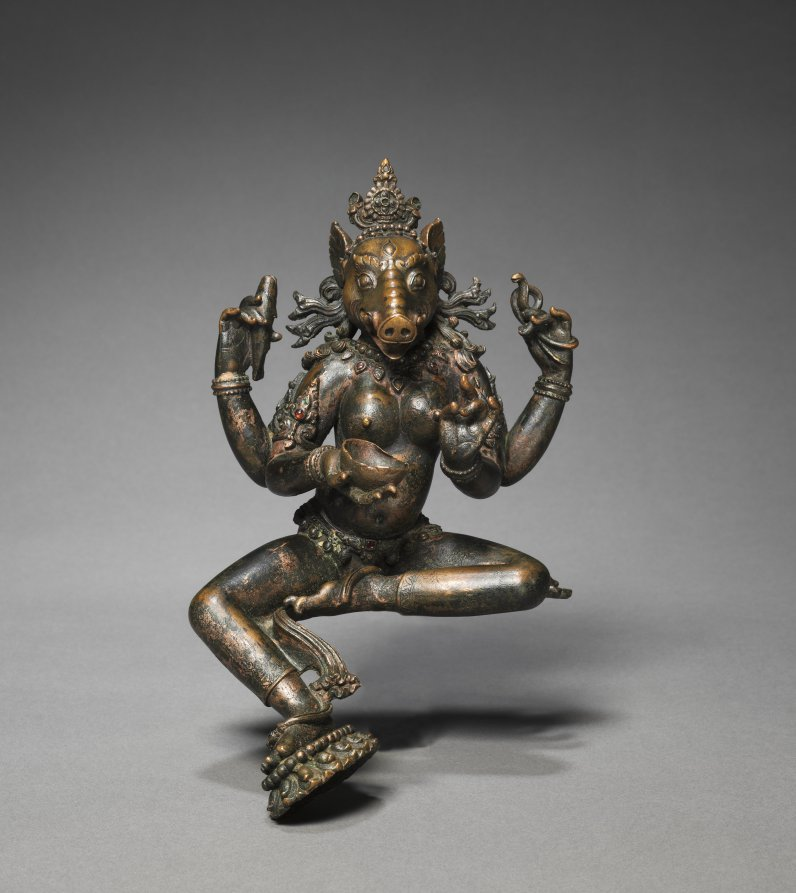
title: Varahi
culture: Nepal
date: c. 1300s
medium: bronze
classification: Sculpture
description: This Hindu goddess has the body of a young mother and the head of a female boar, which is the meaning of the Sanskrit word varahi, with the third eye of true knowledge. This sculpture was one of a set of seven goddesses associated with worship of the Hindu god Shiva or the mother goddess. The objects in three of her four hands reference the countercultural tantric Hindu practices of drinking revolting liquids from a bowl made from a skull. The fish implies the consumption of illicit food, and the snake pertains to the noose that keeps one bound in fear that leads to inevitable death. In tantric Hindu rituals, this goddess would aid the practitioners in overcoming their fears that keep them attached to ordinary life in the world, instead of reaching the liberated state of union with the creator.